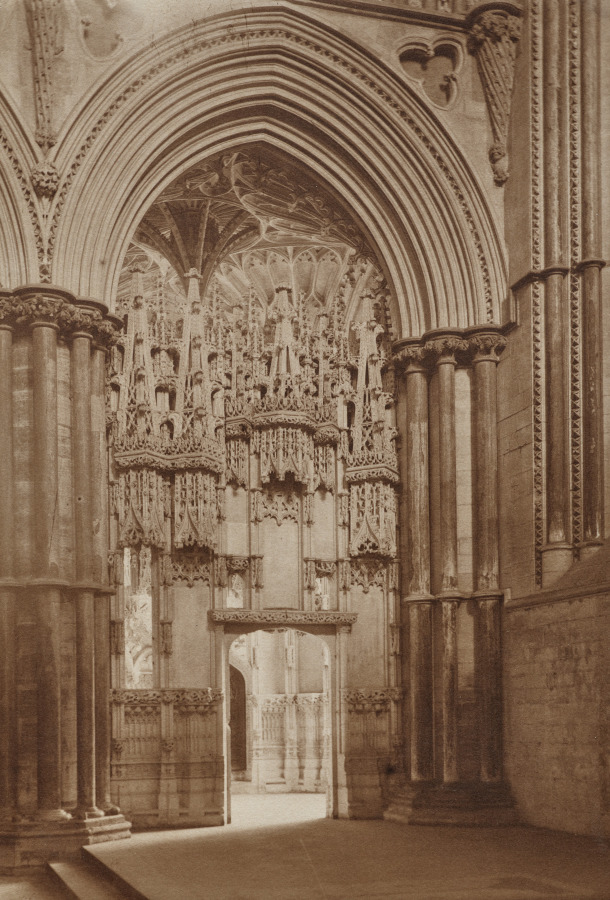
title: Bishop Alcock's Chapel from Reho-Choir, Ely Cathedral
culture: England, 19th century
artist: Frederick H. Evans (British, 1853–1943)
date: 1897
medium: platinum print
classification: Photograph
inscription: Written in pencil on recto of primary mount: “Bishop Alcock’s Chapel”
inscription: Embossed in lower right on recto of primary mount: “FHE”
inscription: Ex-Libris plate adhered to verso of tertiary mount: “Ex Libris/Frederick H. Evans/Let those who/hold the torch/hand it on to/others”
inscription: Written in pencil on verso: “ELY CATHEDRAL”